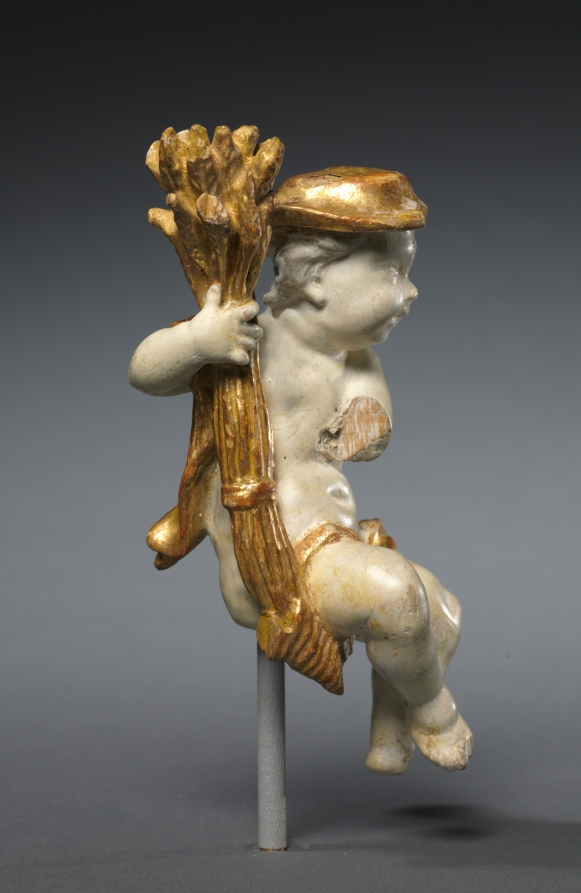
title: Putto as Summer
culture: Germany, 18th century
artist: Ferdinand Tietz (Austrian, 1708–1777)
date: c. 1765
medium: painted and gilded wood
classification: Sculpture